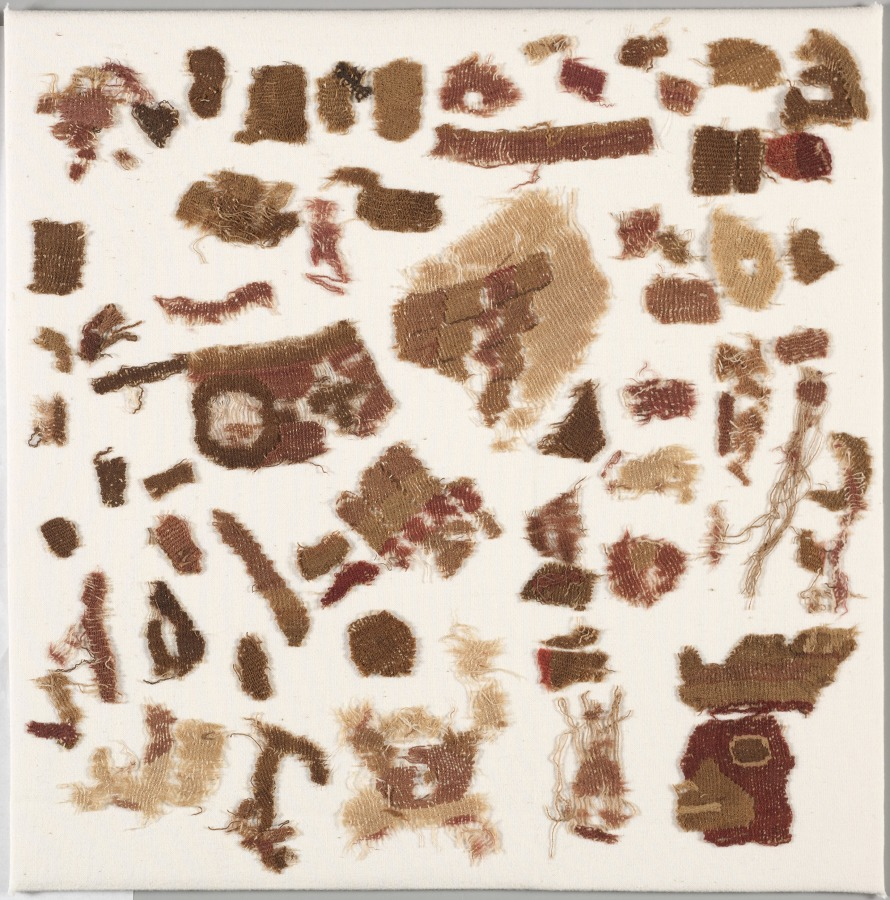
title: Loose Textile Fragments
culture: Peru, Moche, north coast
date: c. 50–650 CE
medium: cotton and camelid fiber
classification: Textile